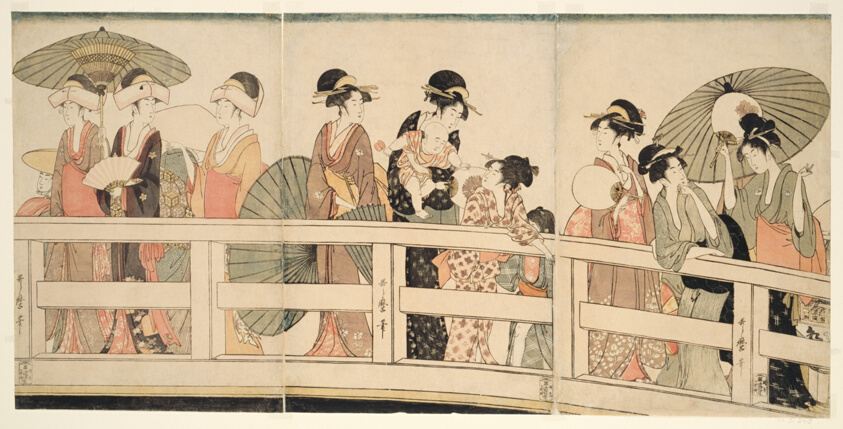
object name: Print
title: On top and beneath Ryogoku Bridge (Ryogokubashi no ue, shita)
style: Japanese (culture or style)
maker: Kitagawa Utamaro 喜多川 歌麿; Japanese, 1753 (?)-1806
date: c. 1795/96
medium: Color woodblock print; oban hexaptych (one of a pair of triptychs)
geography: Japan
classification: woodblock print; print; asian art